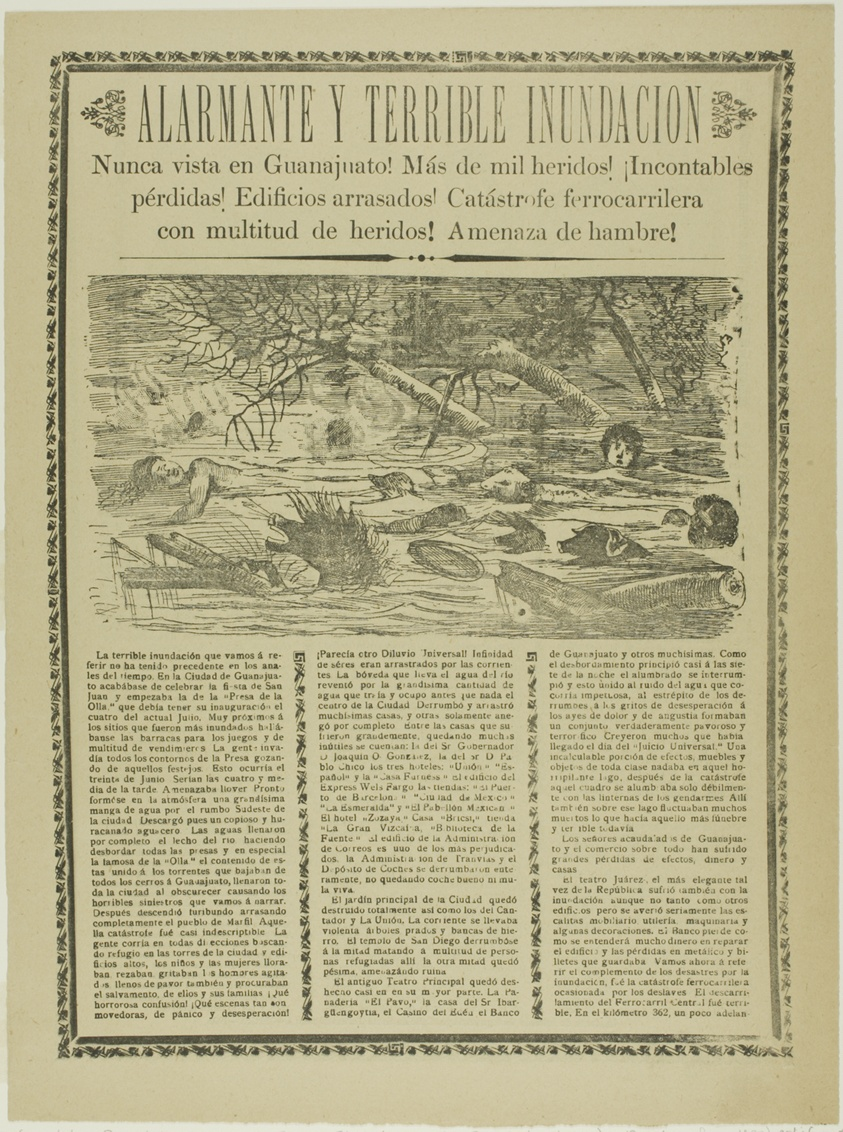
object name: Print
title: Alarming and Terrible Flood, Never Before Seen in Guanajuato!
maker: José Guadalupe Posada (Mexican, 1852-1913)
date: 1905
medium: Photo relief etching with traces of engraving on buff wove paper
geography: Mexico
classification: lithograph; print; prints and drawing